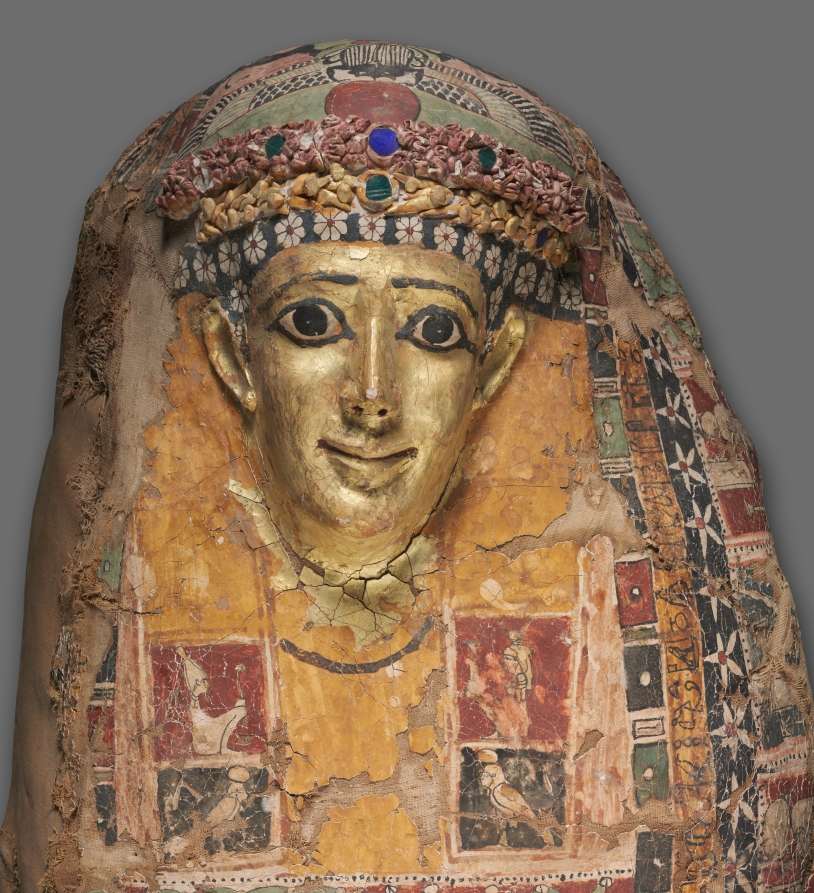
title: Cartonnage Mummy Case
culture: Egypt, Greco-Roman period (332 BCE–395 CE), Ptolemaic dynasty (305–30 BCE)–Roman empire (30 BCE–395 CE)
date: c. 50 BCE–50 CE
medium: cartonnage, painted and gilded, with glass inlays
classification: Funerary Equipment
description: This mummy case is made of cartonnage, a material similar to papier-mâché, but using layers of linen rather than paper. Cartonnage mummy cases such as these are contemporary with funerary portraits painted on wood or linen, although they present a very different appearance. The face, modeled in plaster, is bland and idealized, although the effect of the gilding and glass inlays is quite dazzling. The body is painted with traditional, age-old funerary motifs: the god Osiris, seated and mummiform; the fetish of Abydos, holy city of Osiris, flanked by standing deities (Thoth and Shu); a Horus falcon with outspread wings, and the bark of Sokar. Below these are the sandaled feet of the deceased. On the sides are rows of seated deities. On the top of the head are a winged scarab beetle flanked by Anubis jackals. On the foot are painted the soles of the deceased’s sandals, flanked by scorpions for protection.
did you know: This coffin is smaller and later in date than the other coffins in this gallery. It is made of cartonnage, which used layers of linen to create a material similar to papier-mâché. The painted portrait head displays the influence of Roman portraiture at this time and incorporates both gilding and glass inlays. Despite the fragile materials, this mummy case survived due to the very dry desert climate in which it was found.